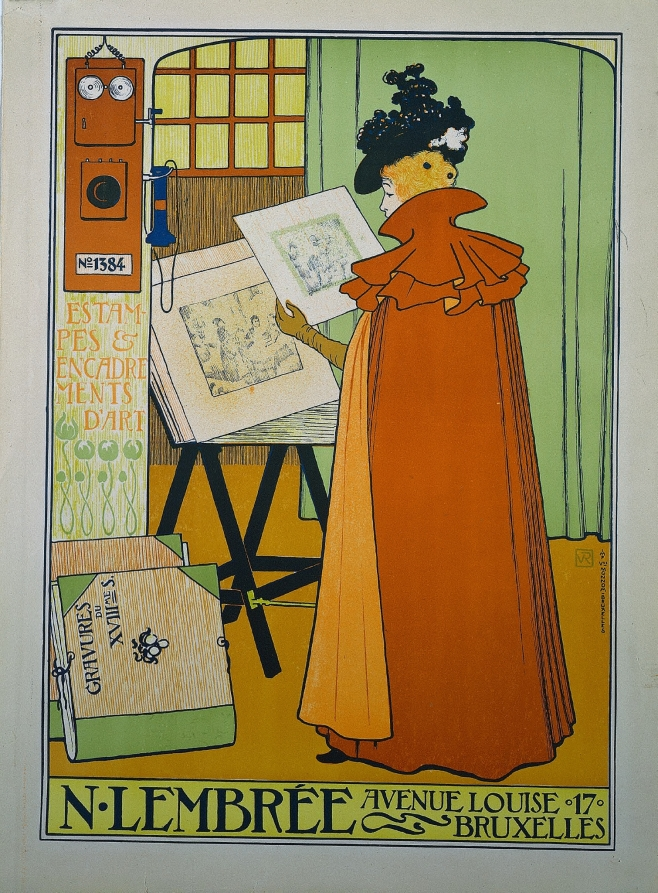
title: Poster for the Lembrée Gallery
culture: Belgium, 19th century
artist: Theo van Rysselberghe (Belgian, 1862–1926)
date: 1897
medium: color lithograph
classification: Print